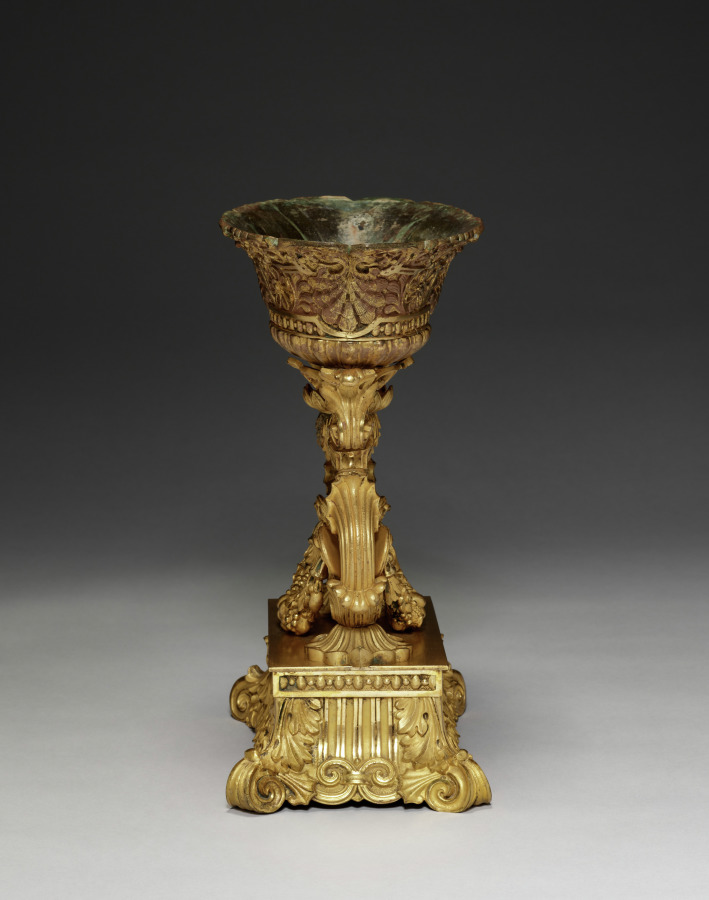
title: Centerpiece, or Jardinière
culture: France, Paris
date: c. 1830–1850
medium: gilt bronze with enamel flowers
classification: Metalwork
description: Regrettably, a maker's mark does not appear on this piece: thus the factory that made it remains unknown. Nevertheless, its design, castings, and gilding are of fine quality and indicate that it is the product of a group of talented craftsmen who worked in the robust taste of the second quarter of the 19th century.